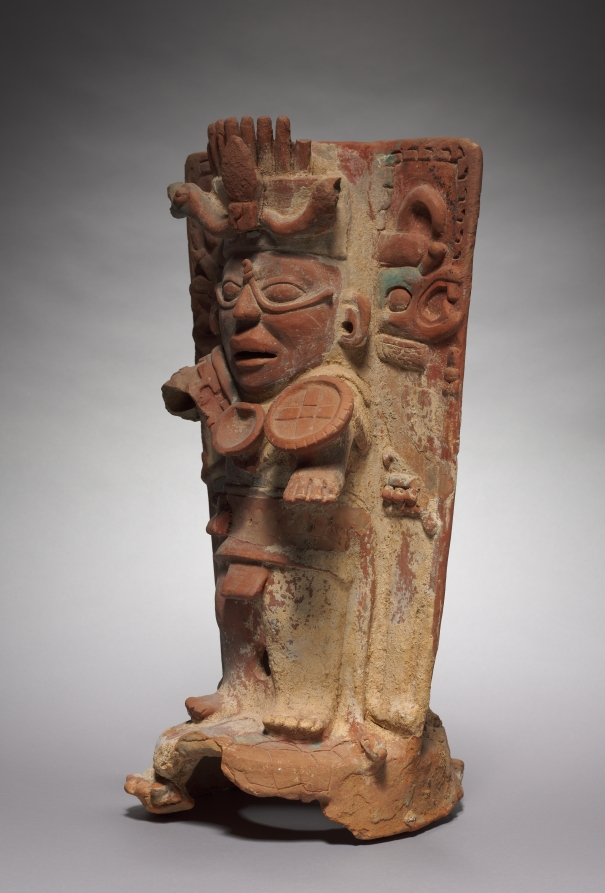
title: Incense Burner Support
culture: Mexico, Chiapas, Palenque Region, Maya, Classic period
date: 600–900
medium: pottery with polychrome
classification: Sculpture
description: This stand, made of a large tube with side panels, originally held a bowl used to ritually burn incense. Modeled on the front is a group that includes the Maya sun deity and two flanking, profile figures in lower relief. All are supported by a turtle, a symbol of the earth and the underworld. Thus, the ensemble may be a model of the cosmos.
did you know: Calcium deposits indicate this incense burner was found in a cave, which the Maya viewed as entrances to the underworld.